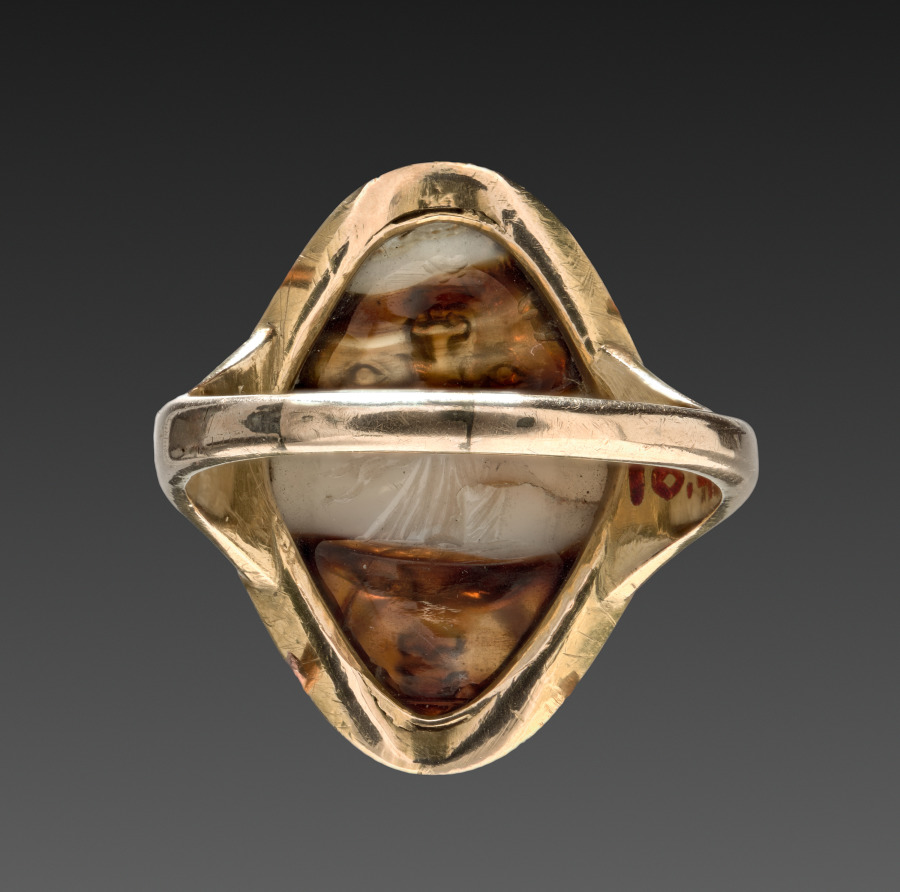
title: Ring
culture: European, 19th century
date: 1800s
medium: metal and hardstone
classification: Jewelry